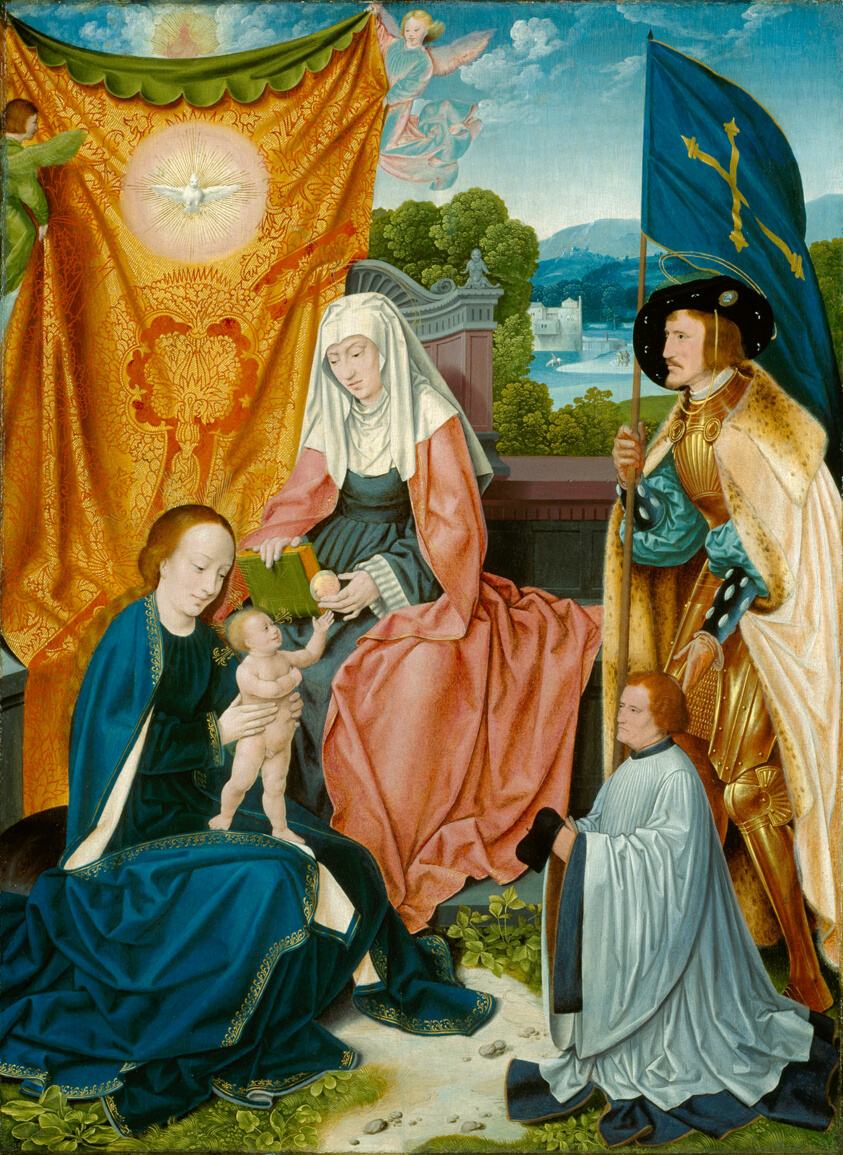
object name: Painting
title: Virgin and Child with Saint Anne, Saint Gereon, and a Donor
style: sixteenth century, 16th Century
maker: Bartholomäus Bruyn the Elder (German, 1493–1555)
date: c. 1520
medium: Oil on panel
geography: Germany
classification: oil on panel; german; paint; painting; european painting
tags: Virgin and child/Madonna and child, water, landscape, Devotion, religious, religion, Christianity, Christian subjects, biblical, angels, men, saints, Century of Progress, world's fairs, Chicago World's Fairs